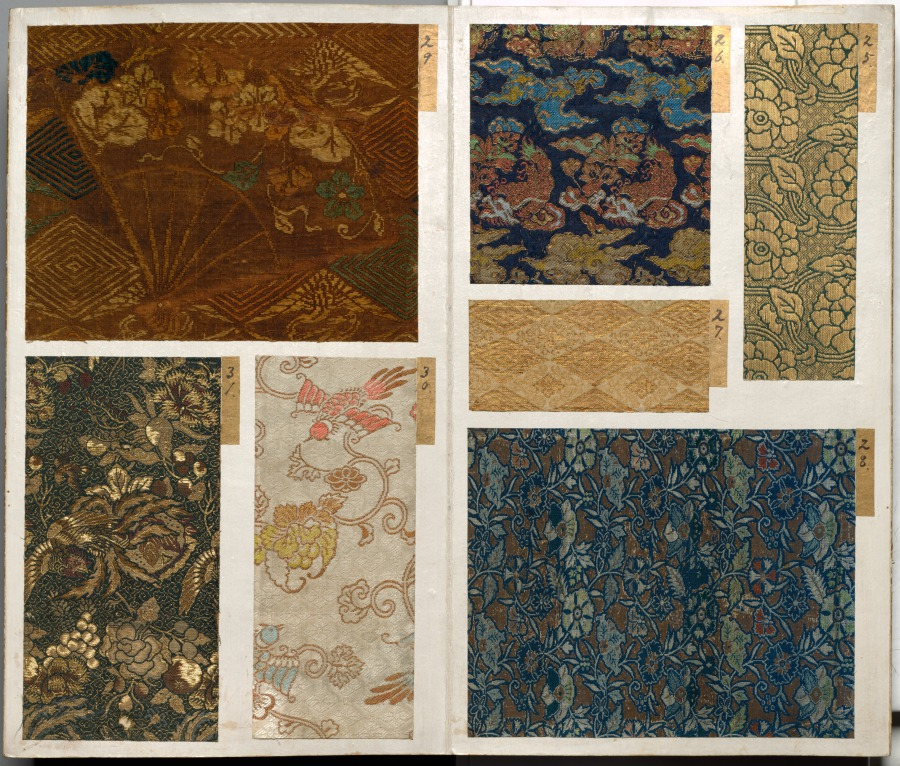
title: Album of Textile Samples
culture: Japan, Edo period (1615–1868)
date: 1600s-1700s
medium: silk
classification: Textile